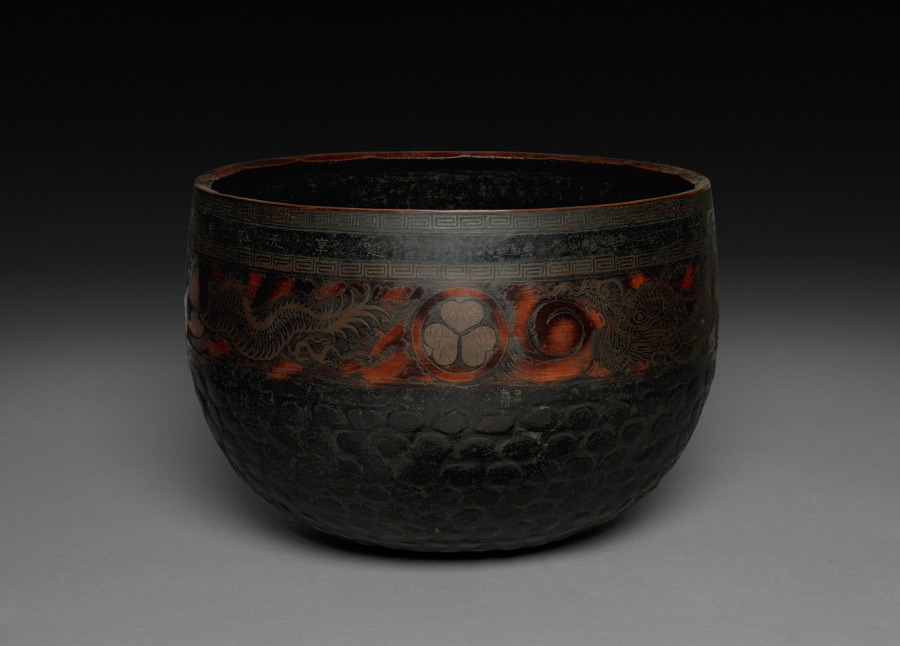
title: Gong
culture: Japan, Edo period (1615–1868)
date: early to mid-1800s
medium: bronze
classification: Metalwork